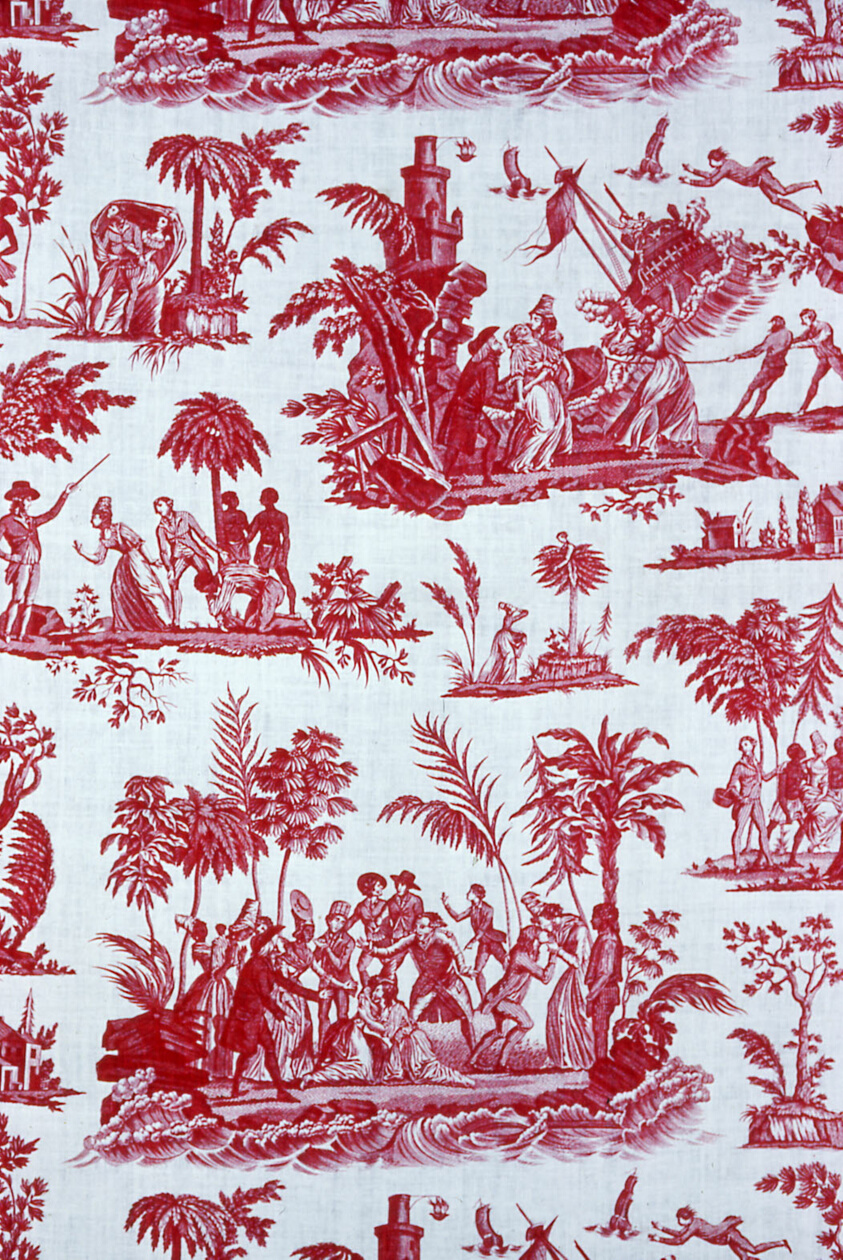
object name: Textile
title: “Paul and Virginie” Furnishing Fabric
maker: Manufactured by Petitpierre et Cie. (French, c. 1790-1802); Based on the story by Bernardin de Saint-Pierre (French, 1737-1814); France, Nantes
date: c. 1795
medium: Cotton, plain weave; copperplate printed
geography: Nantes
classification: weaving - printed; textile; furnishing textile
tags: people, birds, ships, trees, water, waves